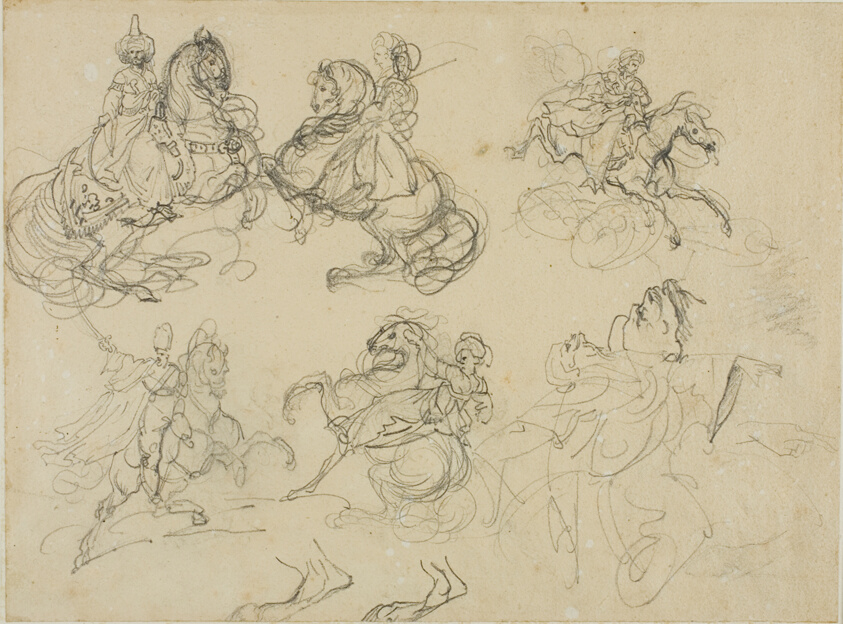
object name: Drawing and Watercolor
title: Sketches of Oriental Horsemen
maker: Jean Louis André Théodore Géricault (French, 1791-1824)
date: 1813/14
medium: Graphite on tan wove paper, perimeter mounted on ivory laid paper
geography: France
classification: graphite; drawings (visual works); prints and drawing